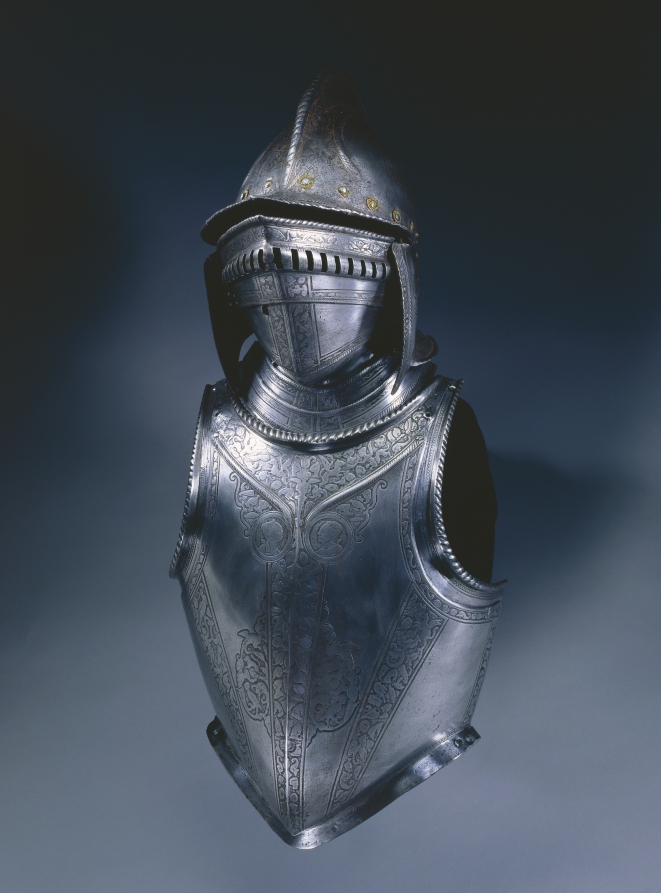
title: Buffe (etched with bands of trophies)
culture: North Italy, 16th century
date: c. 1550–1600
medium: etched steel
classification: Arms and Armor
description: Shown here together is a burgonet, buffe, and breastplate all decorated with a technique known as etching. A burgonet is a light open helmet characterized by a peak, a fall over the eyes, and hinged earpieces. The face is protected by the addition of a buffe, a sperate detachable element worn with the open helmet that extends to the throat. It connects to the breastplate which protects the abdomen and is worn with a backplate.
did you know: Etching is a technique where either the design or its ground is bitten into the metal surface with acid, the rest being protected by a protective wax or varnish.